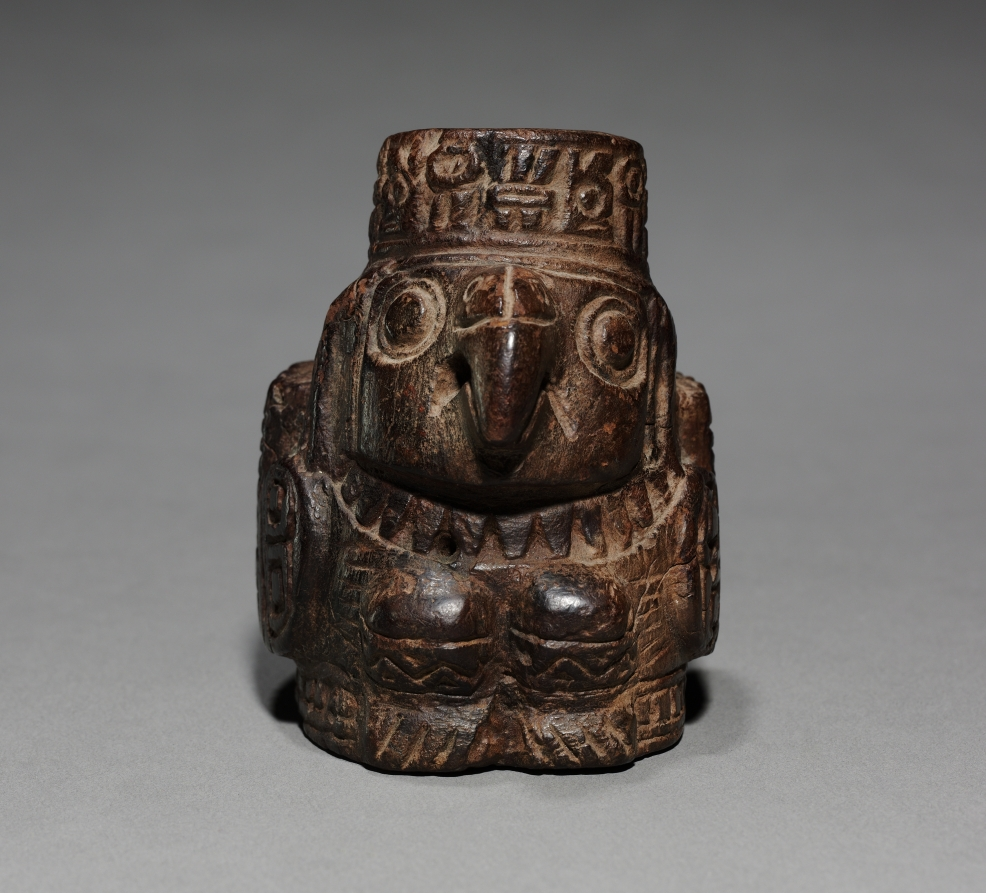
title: Bird-Shaped Container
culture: Peru, Wari style (500-900)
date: 500–900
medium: wood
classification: Sculpture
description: Peruvian Indians today regard coca leaf as a sacred substance that creates communion with deities. The leaves are chewed with powdered lime that in antiquity was stored in containers and scooped with spatulas like those seen here. Aside from its ritual meaning, coca has practical benefits: it is vitamin-rich and, like coffee, induces clear-headedness. The lizard spatula is Nasca; the other two are Wari.